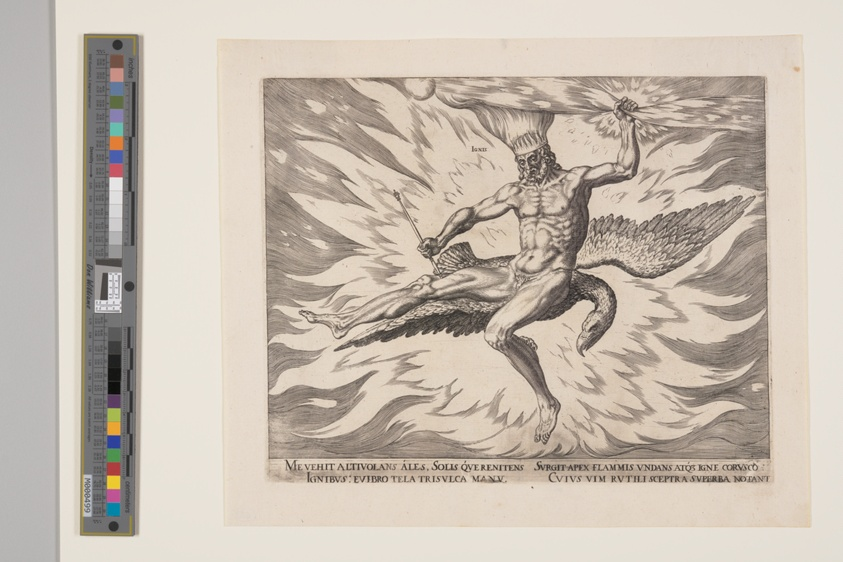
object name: Print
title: Fire, from The Four Elements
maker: Philip Galle; Flemish, 1537–1612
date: 1564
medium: Engraving on ivory laid paper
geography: Flanders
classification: engraving; paper; print; prints and drawing